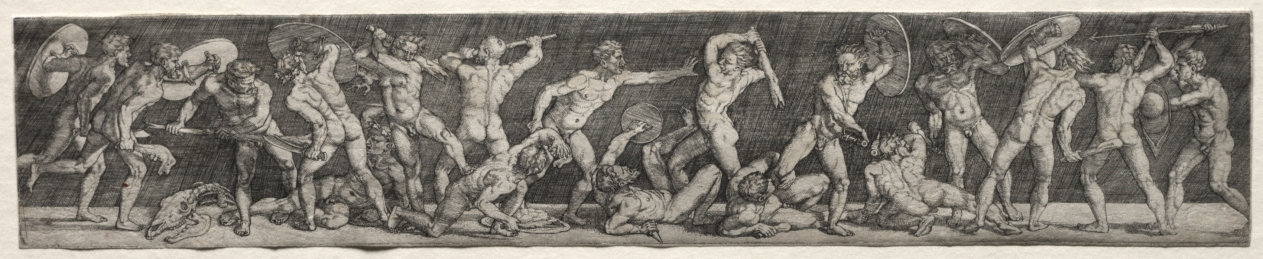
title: Battle of Naked Men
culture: Germany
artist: Barthel Beham (German, 1502–1540)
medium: engraving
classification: Print